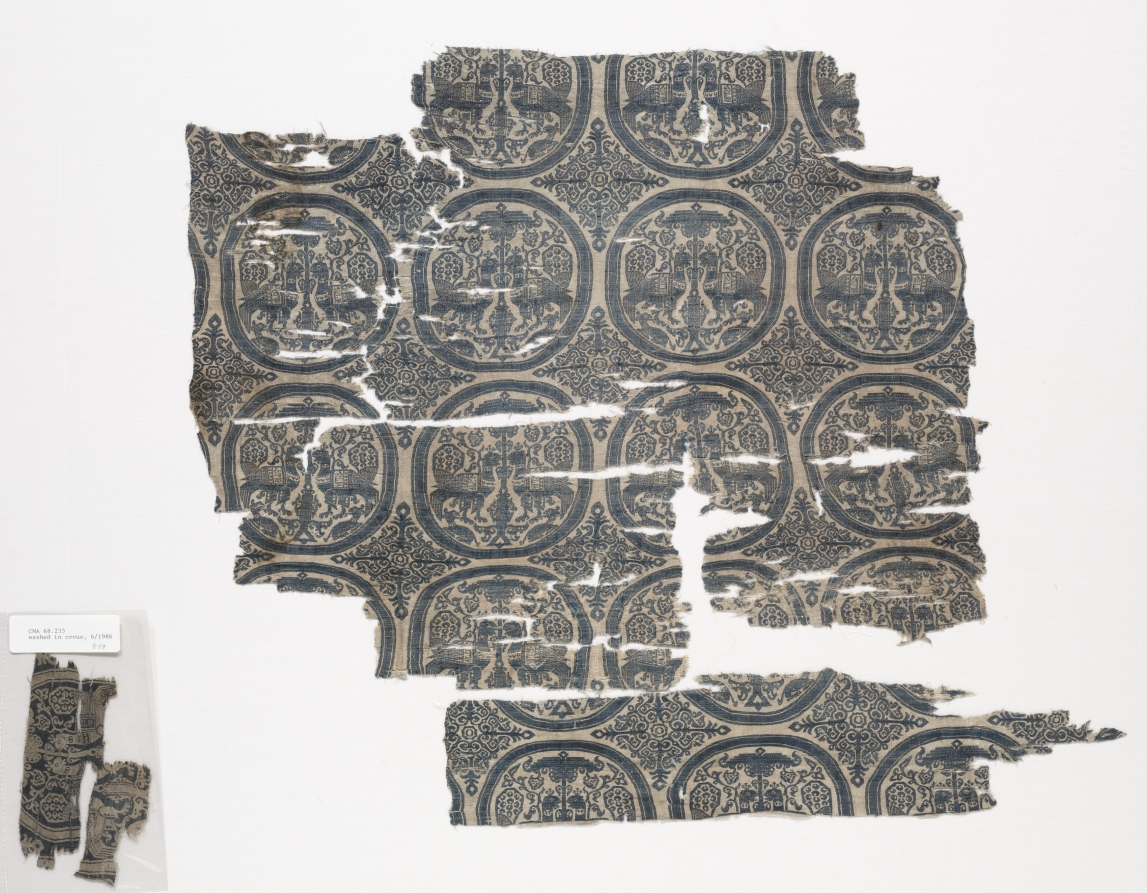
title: Fragment with Inscription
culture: Iran, in the style of the Buyid period (945–1055)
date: before 1968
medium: Silk: compound tabby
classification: Textile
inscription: al-mulk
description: This textile preserves most of 5 rows of aligned roundels; the top row and bottom two rows are very fragmentary. Each roundel contains a tree of life flanked by confronting peacocks with an inscription on its wings. Below the peacocks are recumbent, addorsed, and regardant quadrupeds also flanking the tree. Interspaces are filled with four-directional medallions of stylized plant forms.